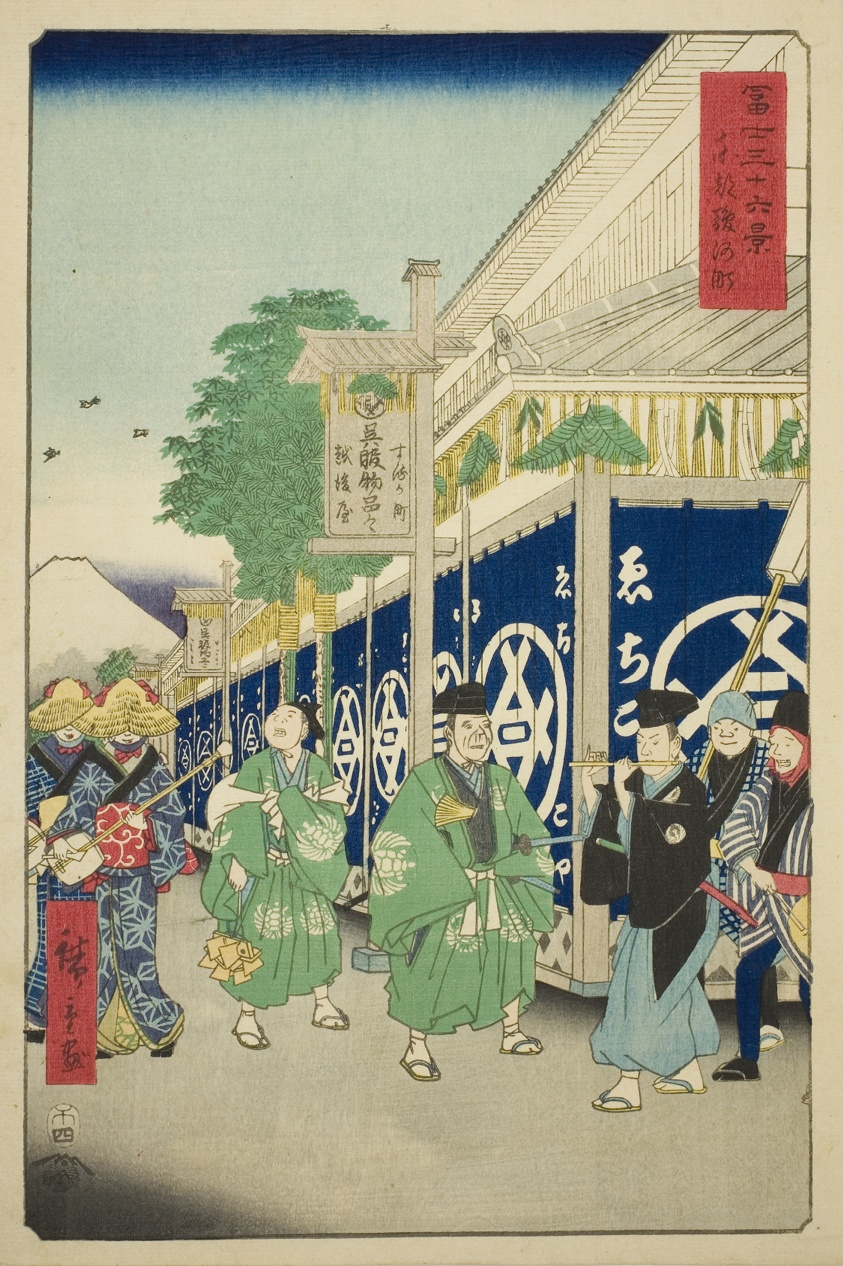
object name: Print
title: The Suruga District in the Eastern Capital (Toto Suruga-cho), from the series "Thirty-six Views of Mount Fuji (Fuji sanjurokkei)"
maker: Utagawa Hiroshige 歌川 広重; Japanese, 1797-1858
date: 1858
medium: Color woodblock print; oban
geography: Japan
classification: print; asian art